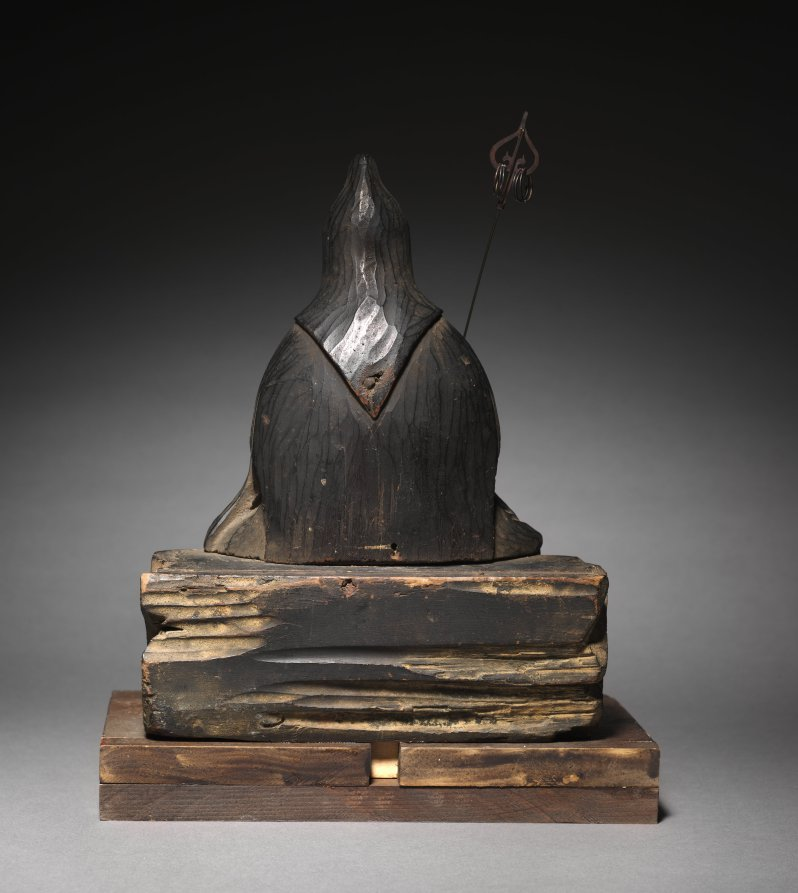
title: En no Gyōja with Zenki and Kōki (En no Gyōja)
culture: Japan, Edo period (1615–1868)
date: 1615–1868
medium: wood with paint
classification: Sculpture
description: This is one of a trio of figures identified as Enno Gyoja and his two attendants, Zenki and Kōki. The set follows the iconography of Shugendo, the traditional mountain ascetic practice in Japan. Enno Gyoja is depicted as a hermit-monk, seated on a rock attached to a modern base. He holds a staff in his right hand and a sutra in the left. The two attendants take the form of half-human, half-demonic figures and are regarded as a married couple.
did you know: These figures' miniaturized format allowed them to be portable devotional statuettes that worshipers could carry as they traveled.